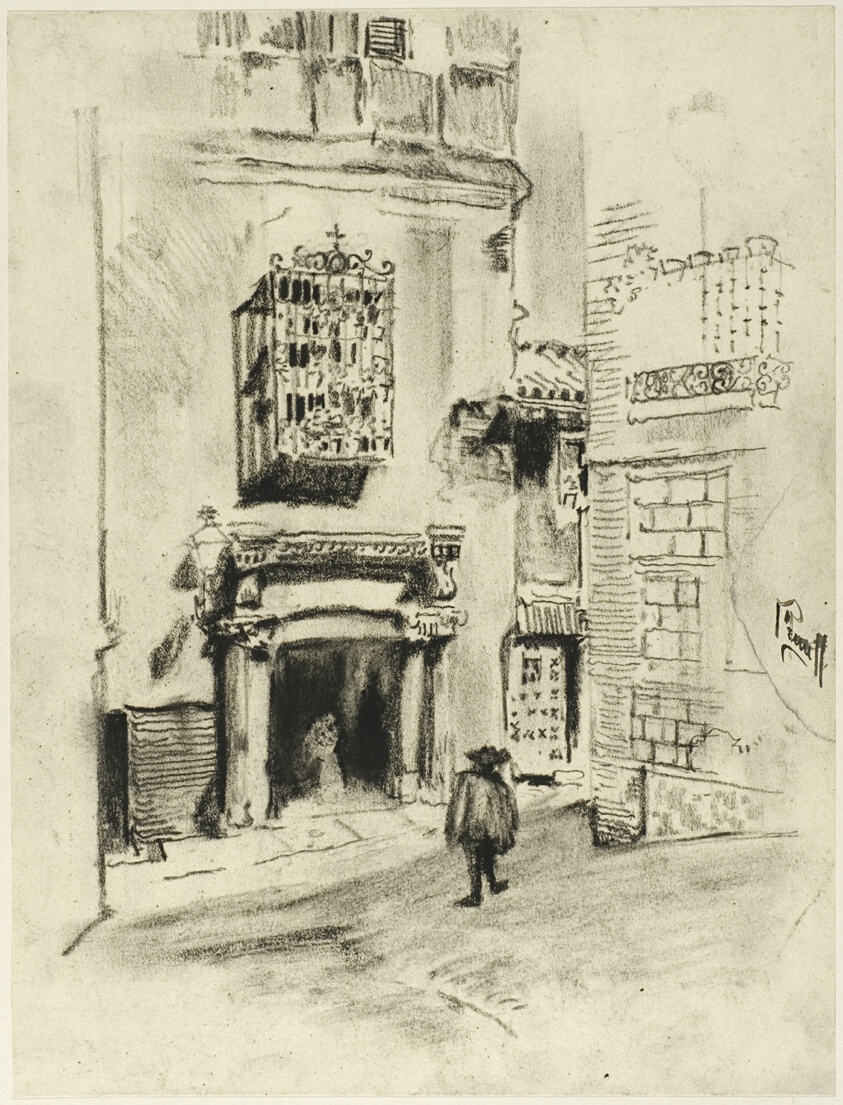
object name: Drawing and Watercolor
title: A Doorway, Toledo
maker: Joseph Pennell (American, 1857-1926)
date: c. 1903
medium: Oiled charcoal with stumping, on cream wove paper, perimeter mounted on off-white wood pulp laminate board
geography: United States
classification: charcoal; drawings (visual works); prints and drawing